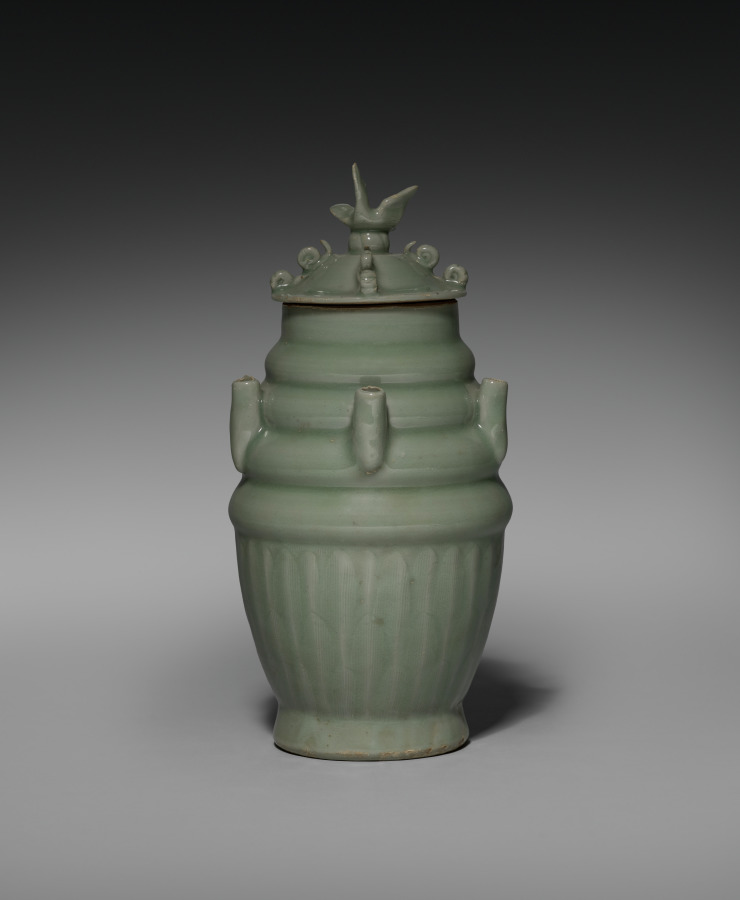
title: Five-Spouted Vase with Cover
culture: China, Zhejiang province, Longquan region, Northern Song dynasty (960-1127)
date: 1000s-1100s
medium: green-glazed porcelaneous stoneware, Longquan ware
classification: Ceramic